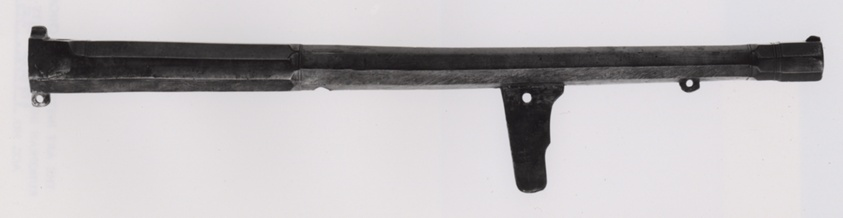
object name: Arms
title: Wall Gun (Hakenbüchse) with Stock and Stand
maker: European, possibly German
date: early 16th century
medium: Bronze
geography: Europe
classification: firearm-cannon; arms; arms and armor